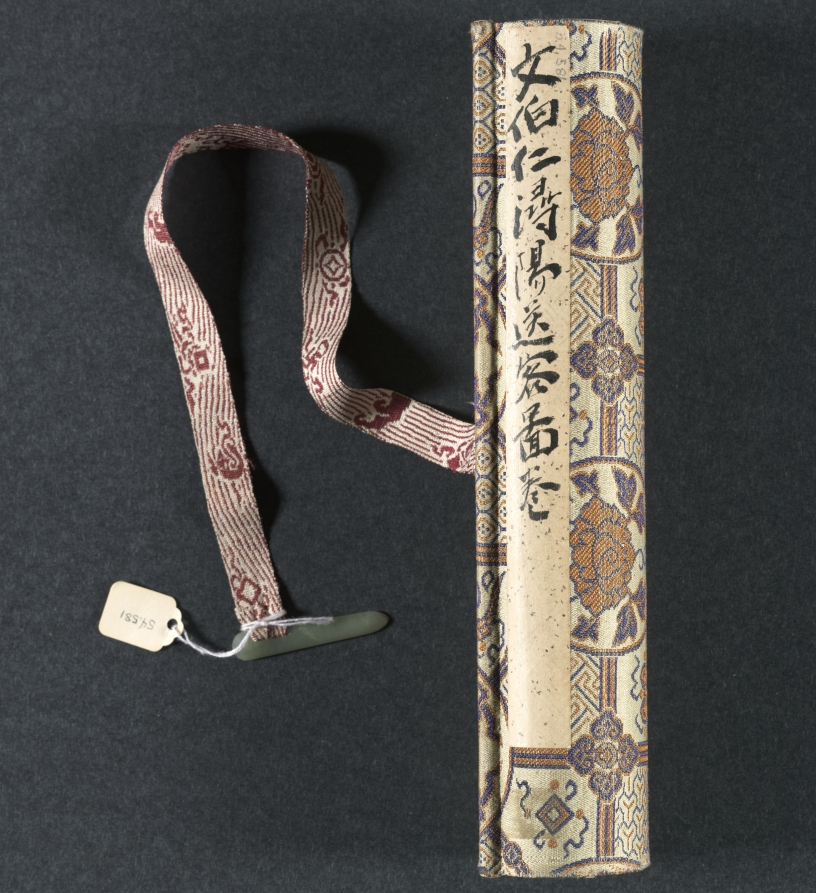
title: Saying Farewell at Xunyang (Song of the Pipa)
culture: China, Ming dynasty (1368–1644)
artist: Wen Boren (Chinese, 1502–1575)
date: 1500s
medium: handscroll, ink and color on paper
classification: Painting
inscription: "潯陽送客圖" 五峰山人文伯仁寫于停雲館中 [印] 文伯仁; 五峰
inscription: 2 colophons and 9 additional seals: 1 transcription of "Pipa xing 琵琶行” (Song of Pipa) and 3 seals of Zhu Yizun 朱彜尊 (1629-1709); 2 seals of Wu Rongguang 吳榮光 (1773-1843); 1 colophon, dated 1826, and 3 seals of Wu Xijia 吳錫嘉 (mid-1700s)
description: This handscroll depicts The Song of the Pipa, a poem by Bai Juyi 白居易 (772–846) written after the poet’s encounter with a pipa player on the Yangzi River. Expelled from her home city when her beauty and fame had faded, she played for the poet at night. Her musical performance and tragic life story resonated with Bai Juyi, who had just been demoted and exiled from life at court himself. The hazy, vast view and pale color tonalities of this painting illustrate these feelings of endless sadness, having lost one’s sense of purpose in life.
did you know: Wen Boren depicted the chilly autumn water with a fishnet pattern.